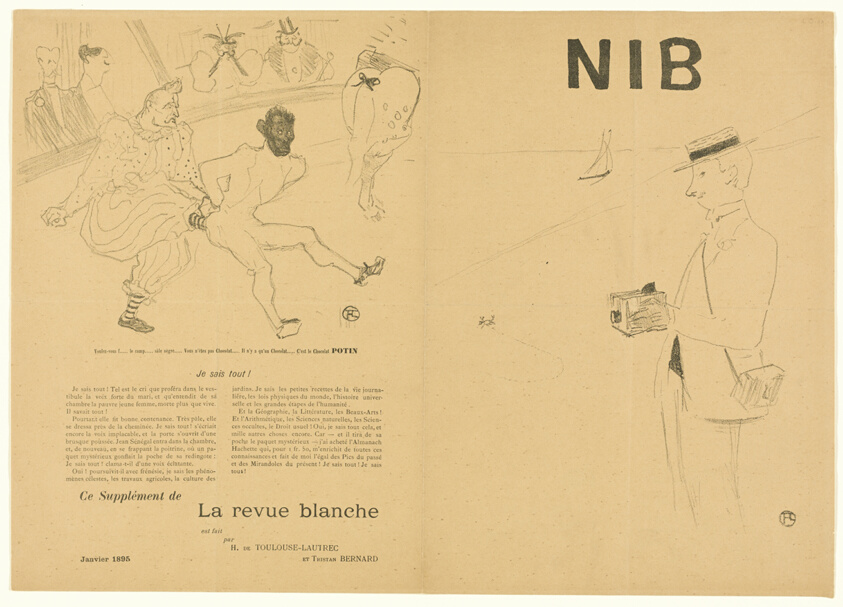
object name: Print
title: The Amateur Photographer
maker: Henri de Toulouse-Lautrec (French, 1864-1901)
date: 1894, published January 1895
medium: Lithographs recto and verso with lettering by the artist and letterpress added, on tan wove paper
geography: France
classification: lithograph; print; prints and drawing